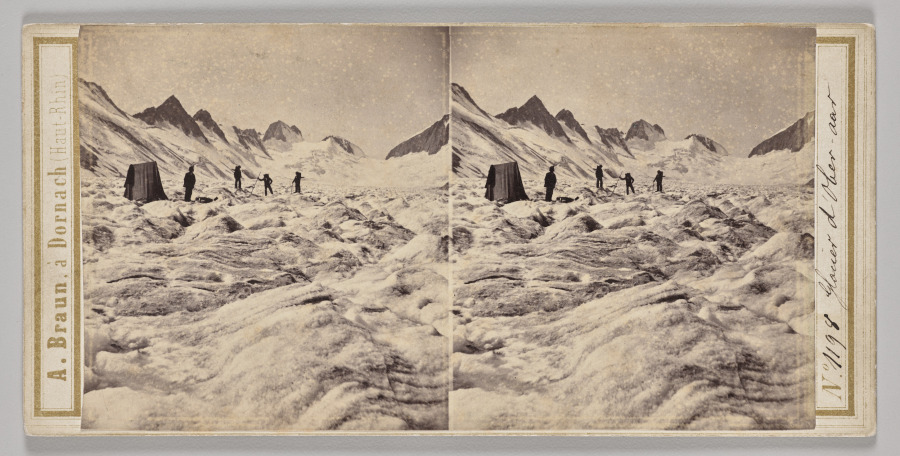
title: No. 1198 Glacier d'Oberaar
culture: France, 19th century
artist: Adolphe Braun (French, 1812–1877)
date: c. 1865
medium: albumen print, stereo card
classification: Photograph